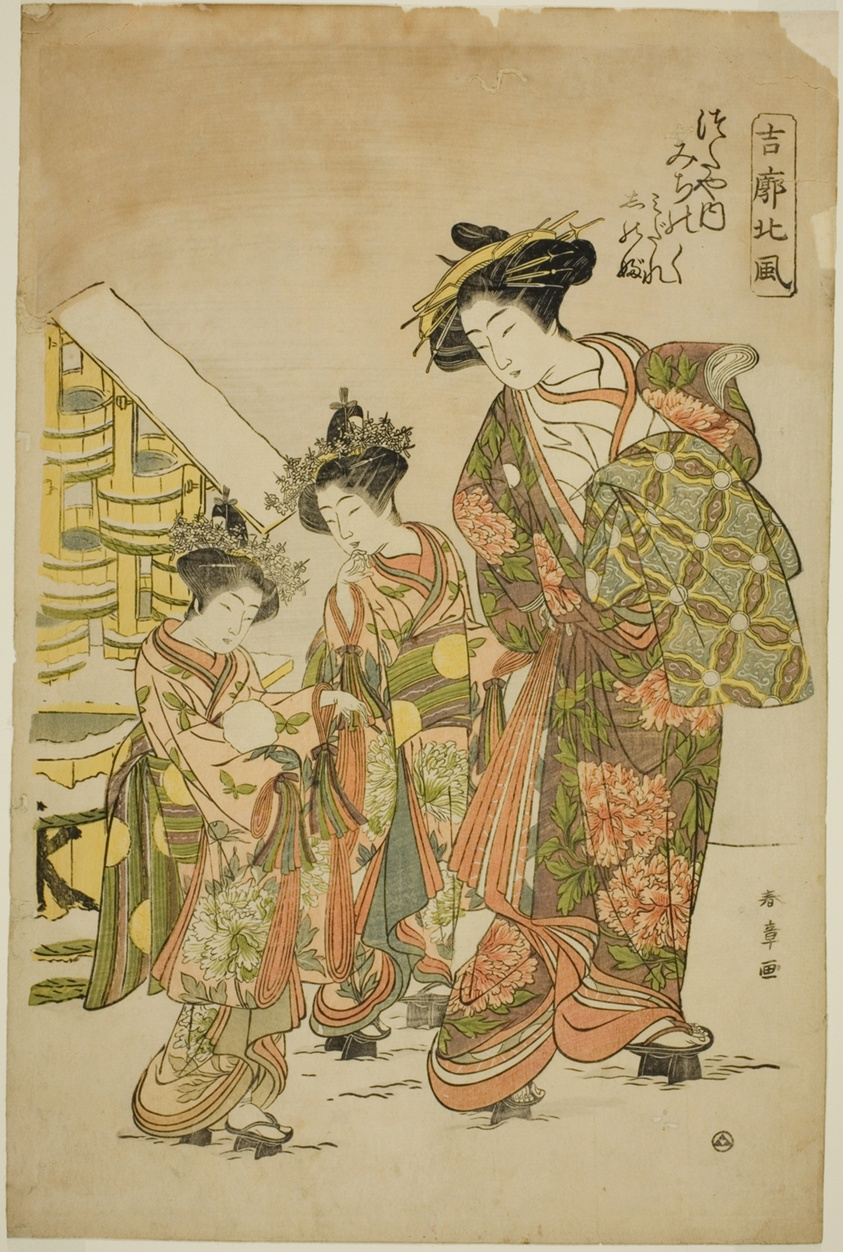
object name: Print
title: The Courtesan Michinoku of the Tsutaya House with her Kamuro Midare and Shinobu, from the series "Kikkaku Hokufu"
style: Japanese (culture or style)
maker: Katsukawa Shunsho 勝川 春章; Japanese, 1726-1792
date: c. 1774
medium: Color woodblock print; oban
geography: Japan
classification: woodblock print; print; asian art